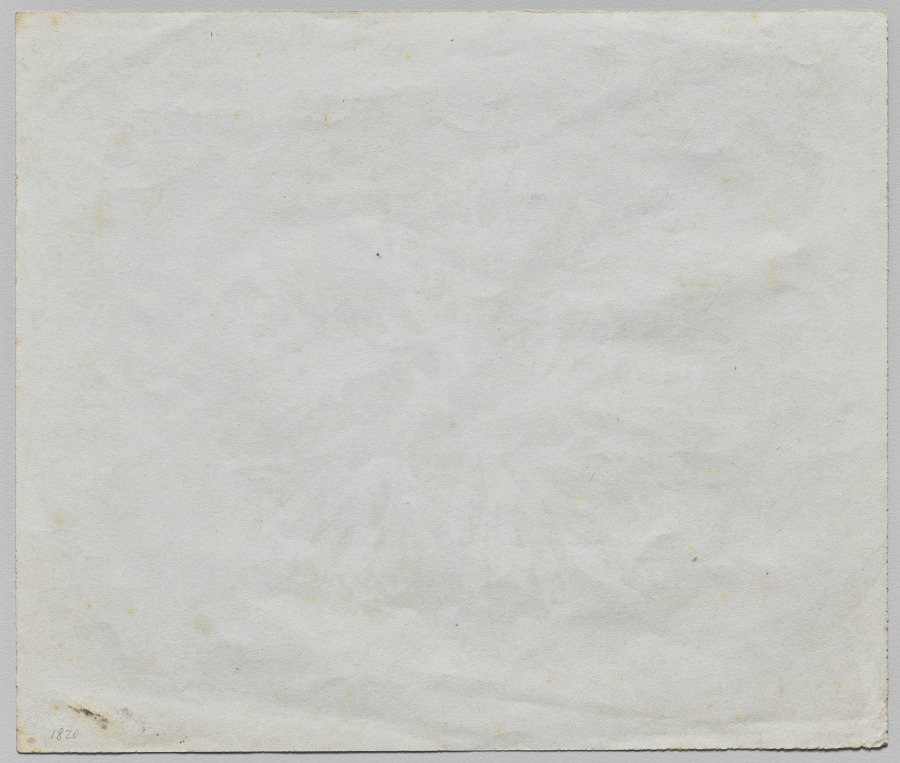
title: Algae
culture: England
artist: circle of William Henry Fox Talbot (British, 1800–1877)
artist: Calvert Richard Jones (British, 1804–1877)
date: c. 1840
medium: Salted paper photographic drawing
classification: Photograph